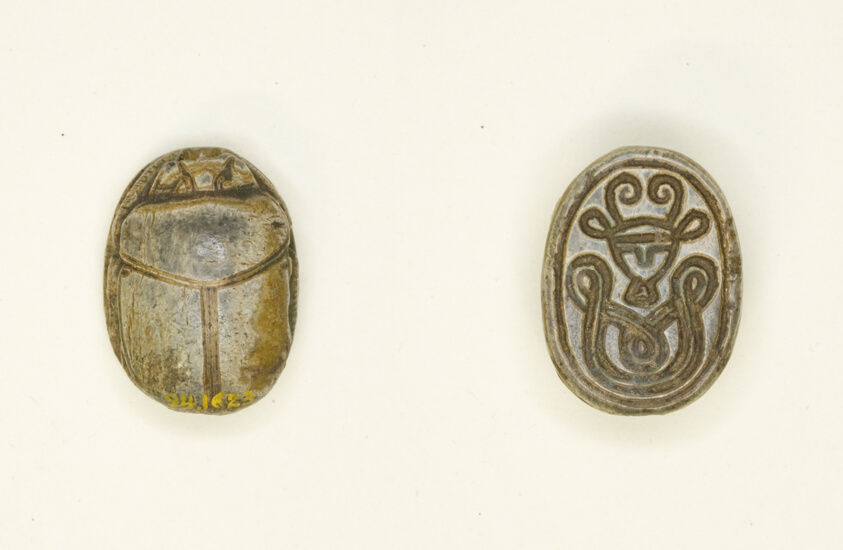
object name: Costume and Accessories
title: Scarab: Hathor Head with Woven Pattern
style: egyptian, middle kingdom, ancient, new kingdom, second intermediate period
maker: Egyptian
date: Middle Kingdom–New Kingdom, Dynasties 12–18 (about 1985–1295 BCE)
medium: Steatite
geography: Egypt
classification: scarab; ancient art; costume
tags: goddesses, insects